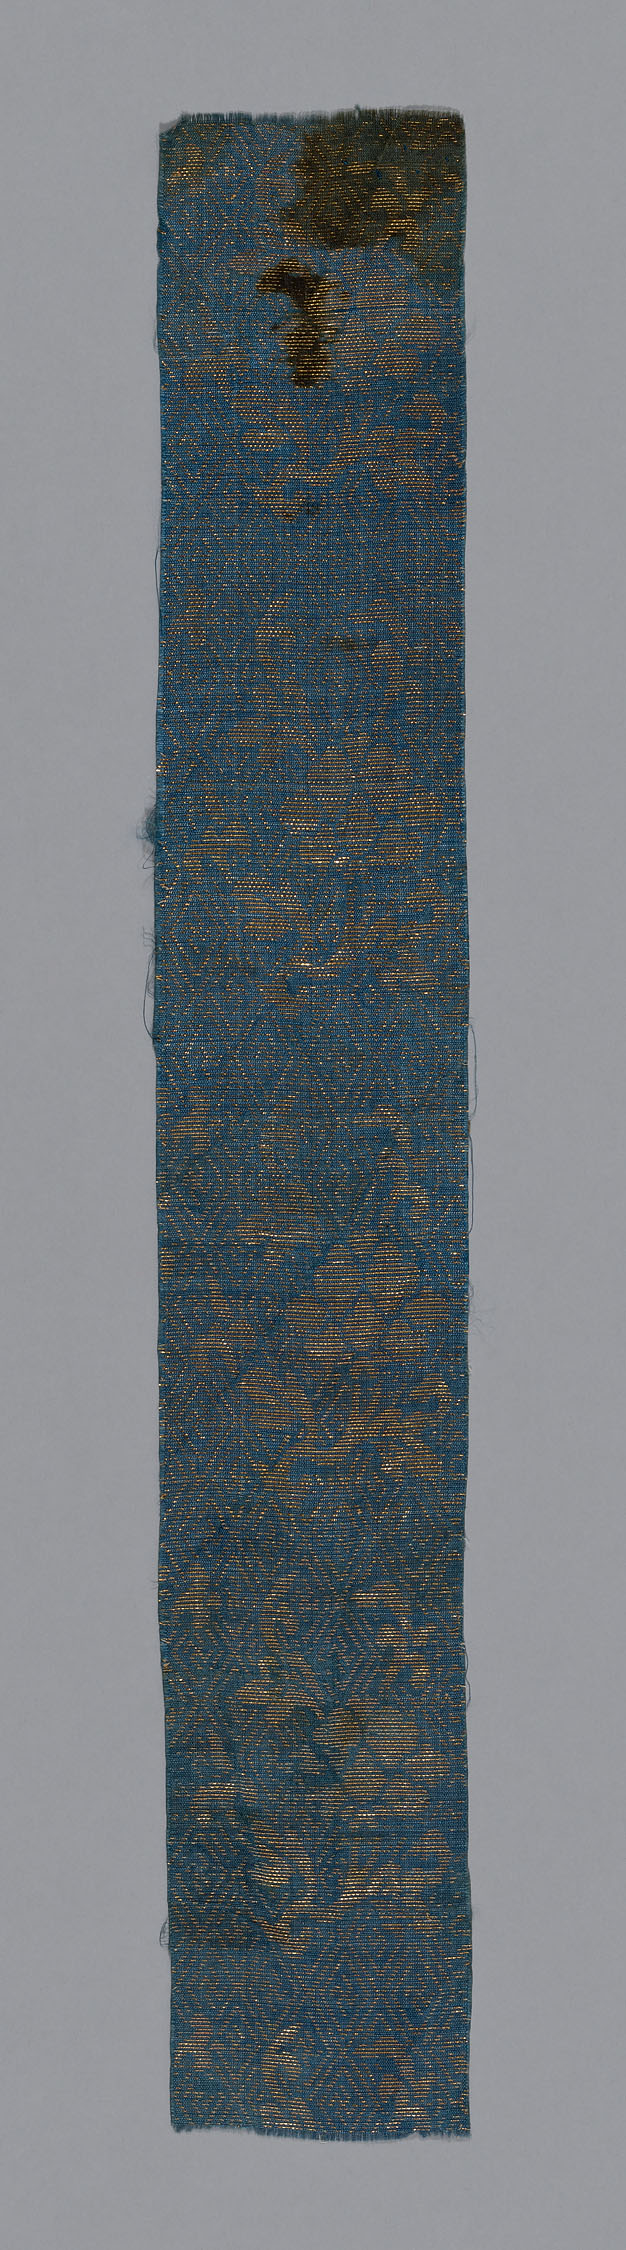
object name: Textile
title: Fragment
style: Japanism, asian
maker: Japan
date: 18th century, late Edo period (1789–1868)/ Meiji period (1868–1912)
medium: Plain compound cloth, silk and gilt paper; three strips to m.m.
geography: Japan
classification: textile; weaving